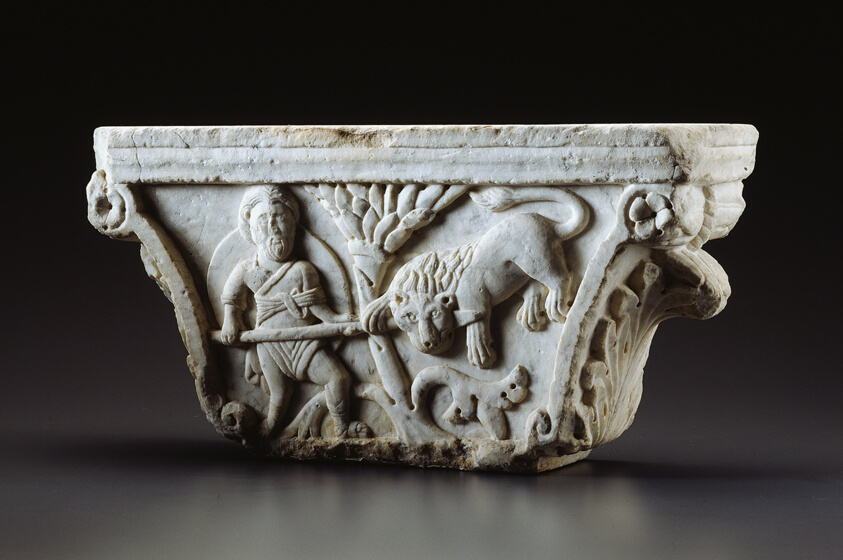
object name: Sculpture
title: Capital with Man Fighting Lion (A) and Riding Griffin (B)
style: medieval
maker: Italian; possibly Lombardy or Tuscany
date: c. 1180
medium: Marble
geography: Italy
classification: architectural sculpture; sculpture; Italian; sculpture/stone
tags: man, architecture, architecture, architectural fragments, architectural fragment, architectural, architectural detail, architechture, figure, mythology, mythological figures, mythical, battles